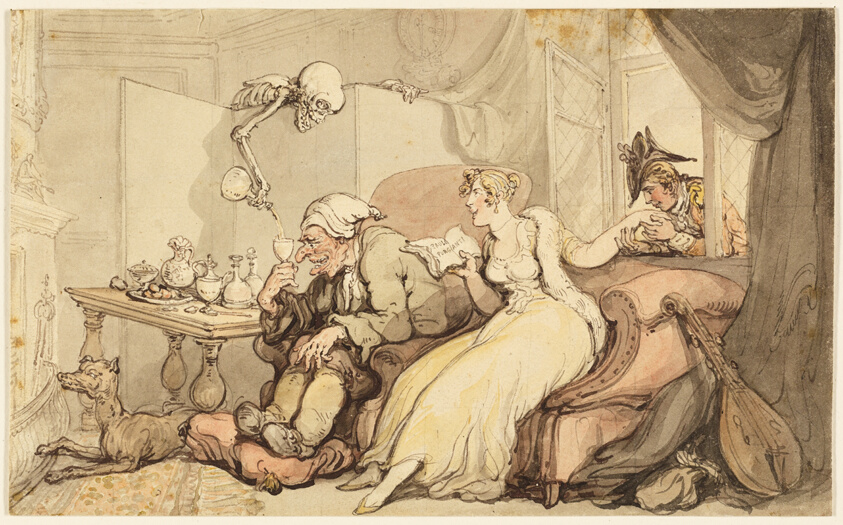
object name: Drawing and Watercolor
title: Study for The Honeymoon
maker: Thomas Rowlandson (English, 1756-1827)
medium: Brush with brown ink and watercolor, over graphite, on cream wove paper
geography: England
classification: watercolor; drawings (visual works); prints and drawing